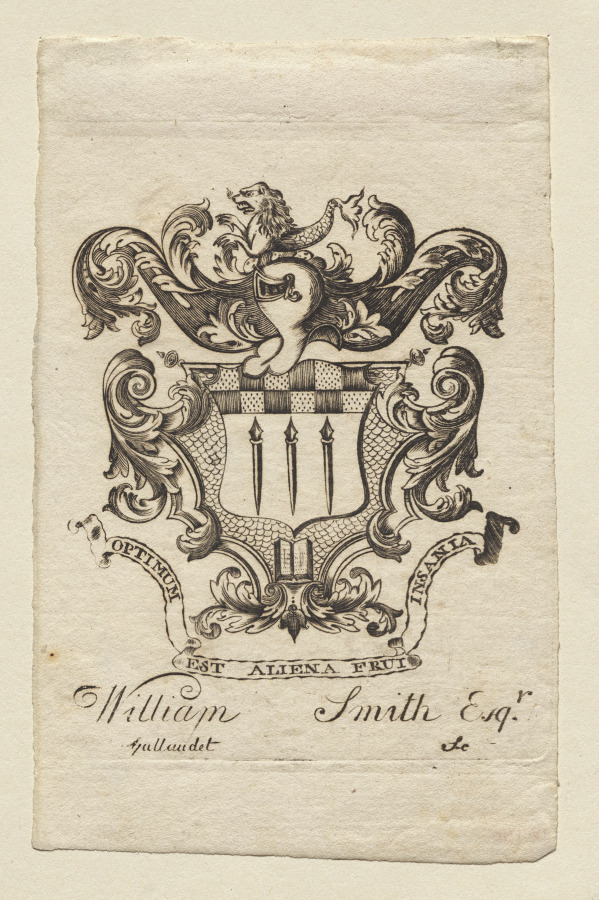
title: Bookplate: Coat of Arms with William Smith, Esq. inscribed below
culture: America, late 18th-early 19th century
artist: attributed to Joseph Callender (American, 1751–1821)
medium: engraving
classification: Print